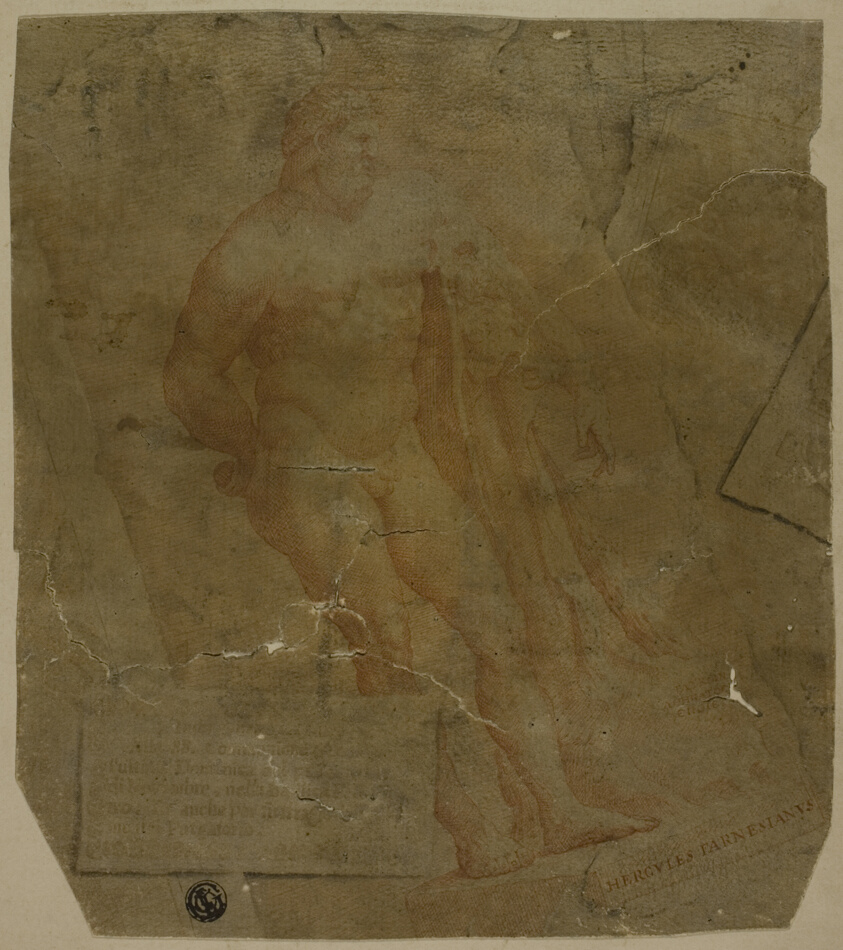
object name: Drawing and Watercolor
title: Hercules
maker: Unknown Artist; European, 18th century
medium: Red chalk, with brush and red chalk wash, on brown laid paper, laid down on cream laminate board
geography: Europe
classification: chalk; drawings (visual works); prints and drawing